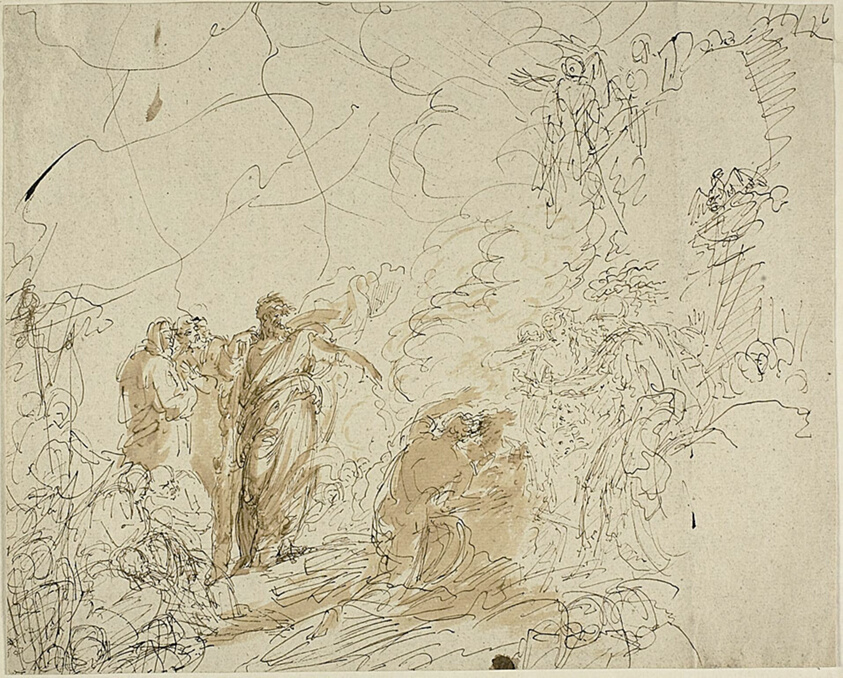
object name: Drawing and Watercolor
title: St. Paul Shaking off the Viper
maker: Benjamin West (American, 1738-1820)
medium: Pen and brown ink with brush and tan wash, on cream laid paper with blue fibers tipped onto cream wove paper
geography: United States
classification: pen and ink drawings; drawings (visual works); prints and drawing